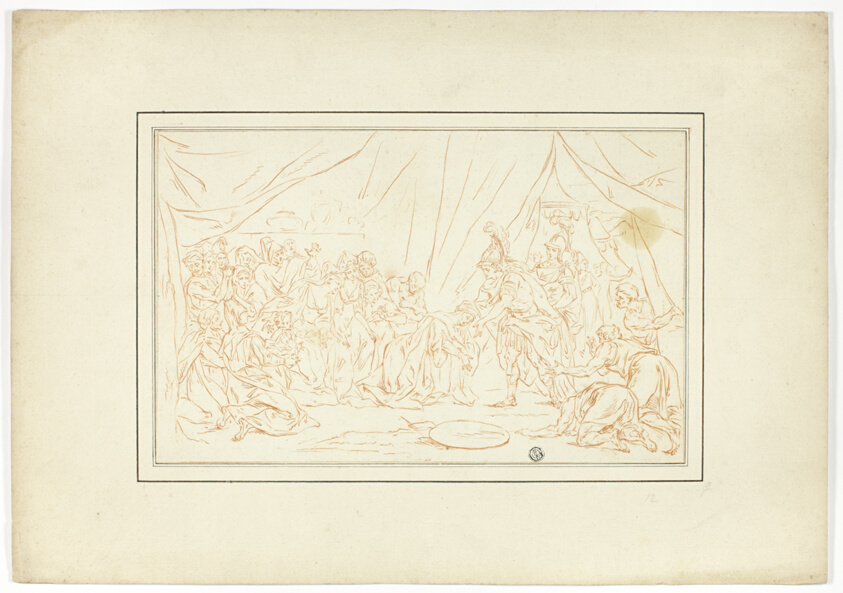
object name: Drawing and Watercolor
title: Alexander and the Family of Darius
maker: After Charles Le Brun; French, 1619-1690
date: 18th century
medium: Red chalk on cream laid paper, laid down on cream laid paper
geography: France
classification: chalk; drawings (visual works); prints and drawing